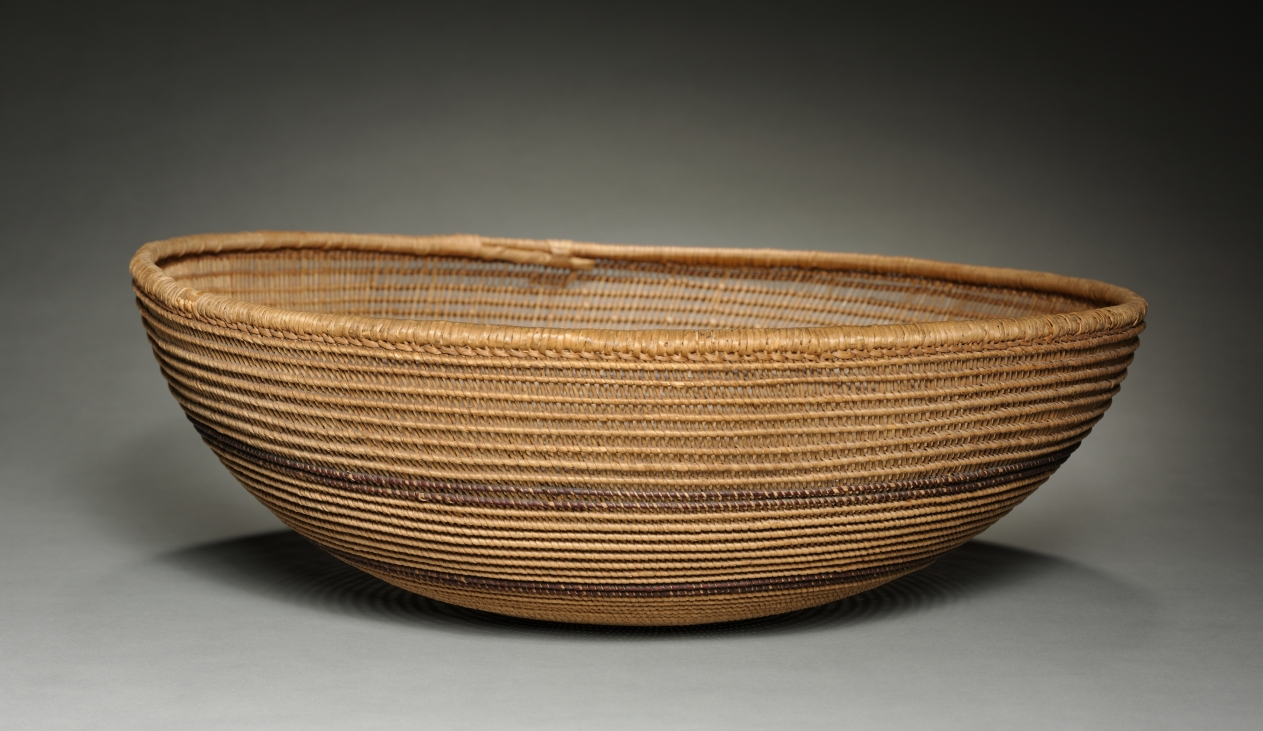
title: Tray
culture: California, Pomo, late 19th- early 20th century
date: 1895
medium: plain twine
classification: Basketry